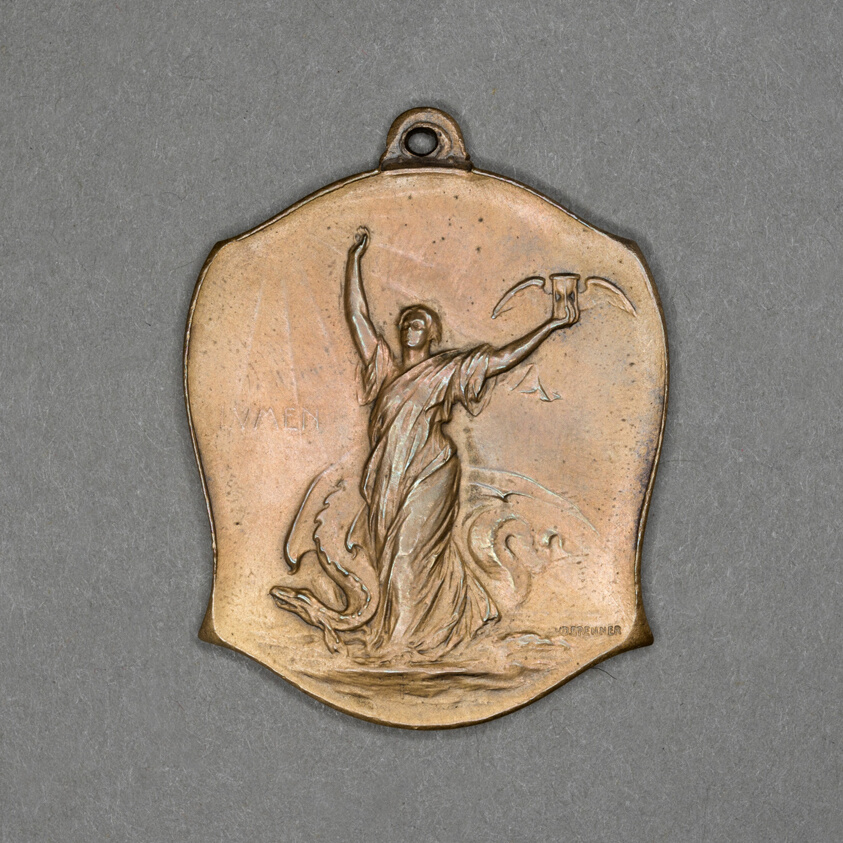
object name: Metalwork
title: Medal commemorating International Congress on Tuberculosis, Washington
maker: Victor David Brenner (American, born Šiauliai, Russian Empire, now Lithuania, 1871–1924)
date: 1908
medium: Bronze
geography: United States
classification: medal; american arts; decorative arts